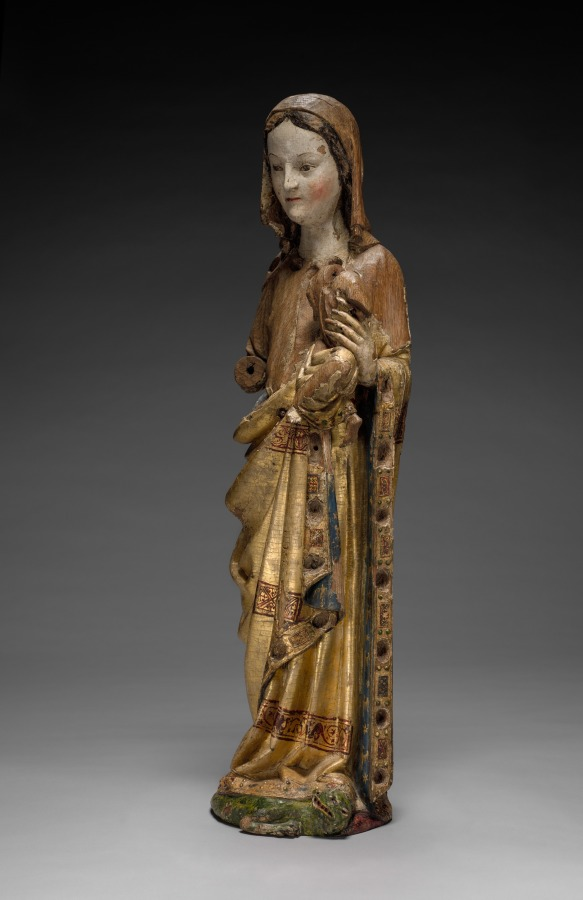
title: Virgin and Child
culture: Mosan (Valley of the Meuse), Liège(?), late 13th century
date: late 1200s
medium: wood (oak) with polychromy and gilding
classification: Sculpture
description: This sculpture is a rare survival in wood from the valley of the Meuse River (modern Belgium and Holland), an important region for the production of ecclesiastical art in the 1100s and 1200s. The elegantly draped figure is remarkable for the preservation of much of its original paint and gilding, including the Virgin's gilded mantle highlighted with decorative bands of geometric patterns and the green dragon on which she stands. There are small settings around the Virgin's neck and along the border of the mantle that would have originally been set with gem and glass cabochons in imitation of the richly adorned metalwork for which Mosan art was highly esteemed. The settings for these cabochons provide some hint of the original opulence of this sculpture. The Virgin's serene features and beautiful countenance are noteworthy, as is the refined execution of the draperies.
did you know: Dragons, like the one Mary is standing on, sometimes look more like snakes in medieval art.